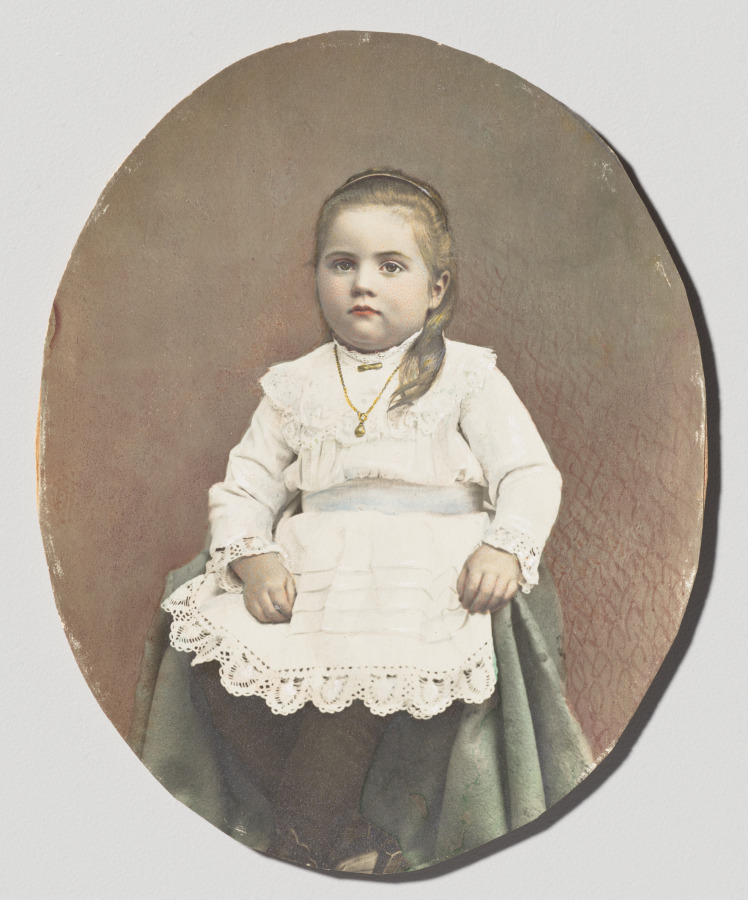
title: Clara L. White as a Child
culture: America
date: 1885–86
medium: Matte collodion with hand-applied crayon and paint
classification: Photograph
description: Virtuoso painting is possible on this very intimate scale, yielding an image that lies on the border between the worlds of photography and the painted miniature. Because the subject’s name and life dates were written on the back, we have found out that White (1883–1987), who never married, spent her life in the vicinity of Winchester, Connecticut, and worked at least into her late sixties as a stenographer and later, secretary to the principal of a school.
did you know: There is a black-and-white photograph underneath all the paint here.